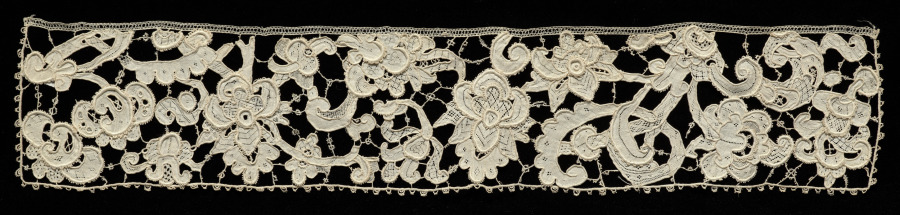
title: Lace Border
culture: Italy, Venice, 1600s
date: 1600s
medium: Needle lace (Venetian Raised Point) with Rosaline brides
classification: Lace